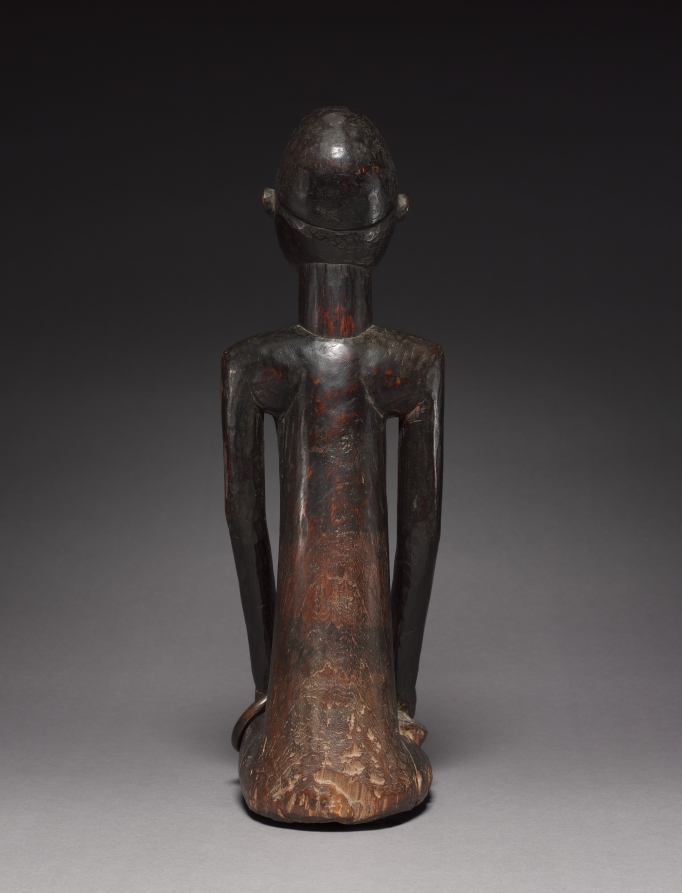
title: Male Figure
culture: Africa, Central Africa, Republic of the Congo, Beembe-style maker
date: late 1800s-early 1900s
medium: Wood, ceramic or Formica, copper alloy, and iron alloy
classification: Sculpture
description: This sculpture played a role in ancestral worship among the Beembe people. Ancestors are held in high regard among the Beembe, and this figure is thought to represent an idealized form of a deceased individual within the ethnic group. The object is one of only two seated male Beembe figures of this size in Western institutions.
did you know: This figure is considered “monumental” as most other types of Beembe figures measure about 15 centimeters tall.